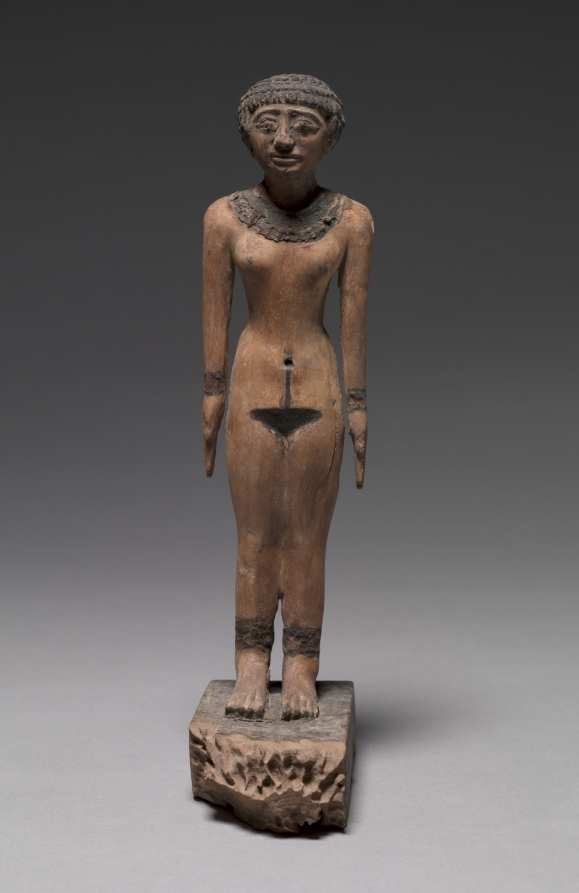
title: Female Statuette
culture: Egypt, Middle Kingdom (2040–1648 BCE), Dynasties 11–12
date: c. 2040–1859 BCE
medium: painted wood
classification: Wood